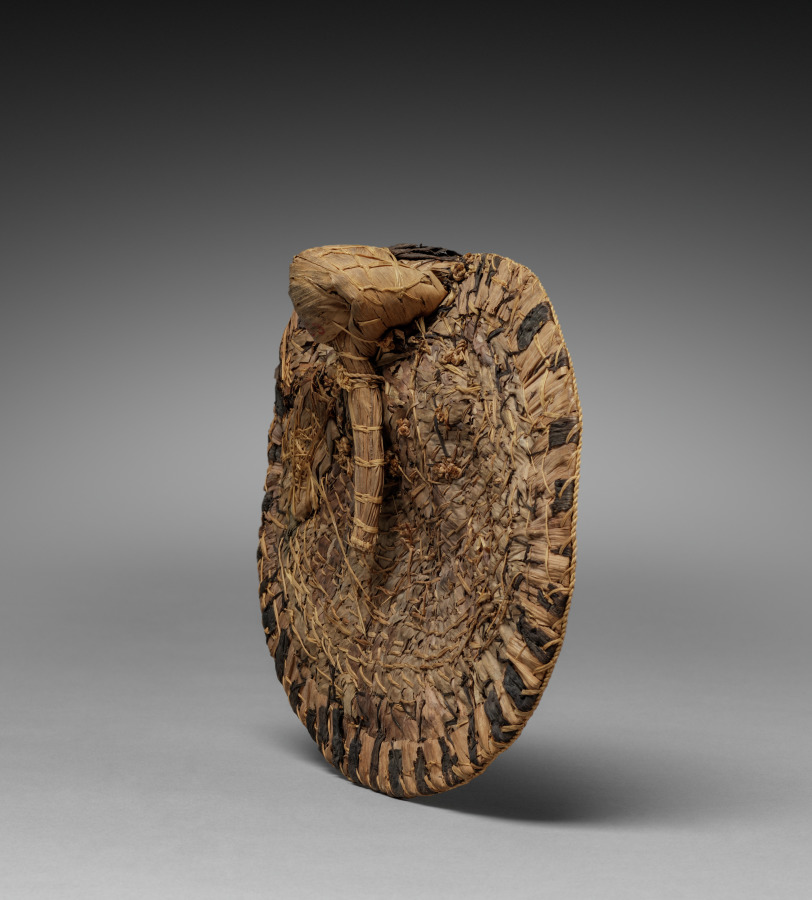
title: Back Skirt/Sitting Pad (negbe)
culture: Africa, Central Africa, Democratic Republic of Congo, Mangbetu-style makers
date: by 1928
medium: Plant fibers and dye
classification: Garment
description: Egbe (singular: negbe) were fashionable and practical garments aristocratic Mangbetu women made for special occasions. Worn over a skirt, it tied onto a girdle along with a frontal “apron.” The curved interior piece rested on the lower back. Thickly woven, flexible natural fibers bent with the body, cushioning the wearer’s behind when sitting. When the woman was standing, the decorated flat portion faced outward, showing off bold geometric motifs. Egbe were among items sold to foreigners at the Mangbetu king’s encouragement as the Mangbetu actively constructed their self image for outsiders during the 1920s and 1930s.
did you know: A curved "handle" on the negbe's interior allowed it to rest on the tailbone.